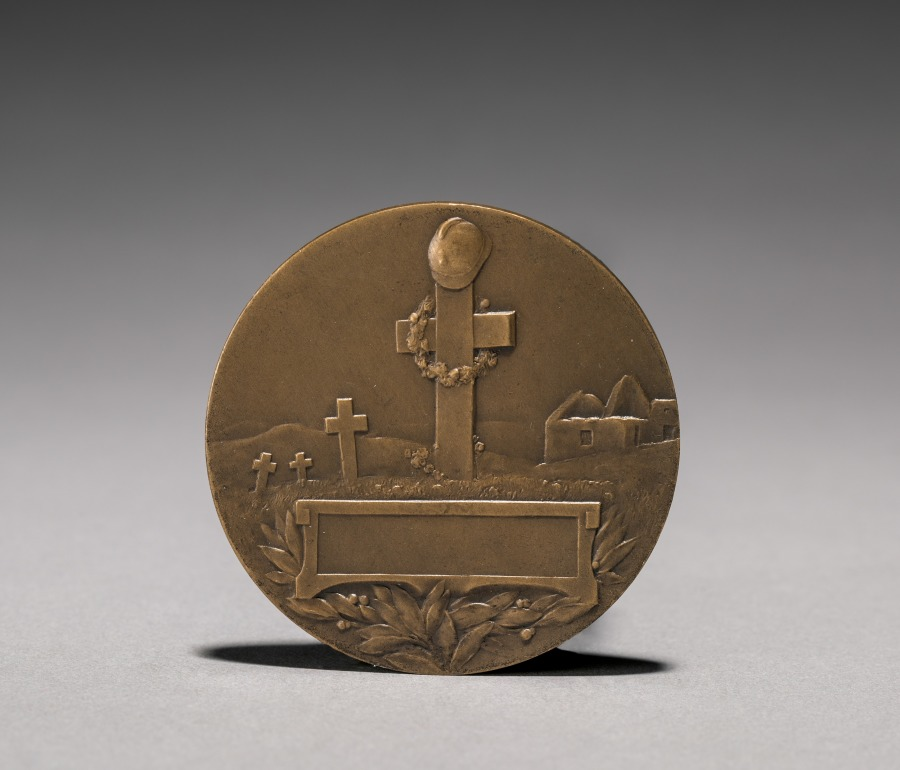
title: Medallion (reverse)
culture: France, 20th century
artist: Edouard Fraisse (French, 1880–1945)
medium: bronze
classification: Metalwork